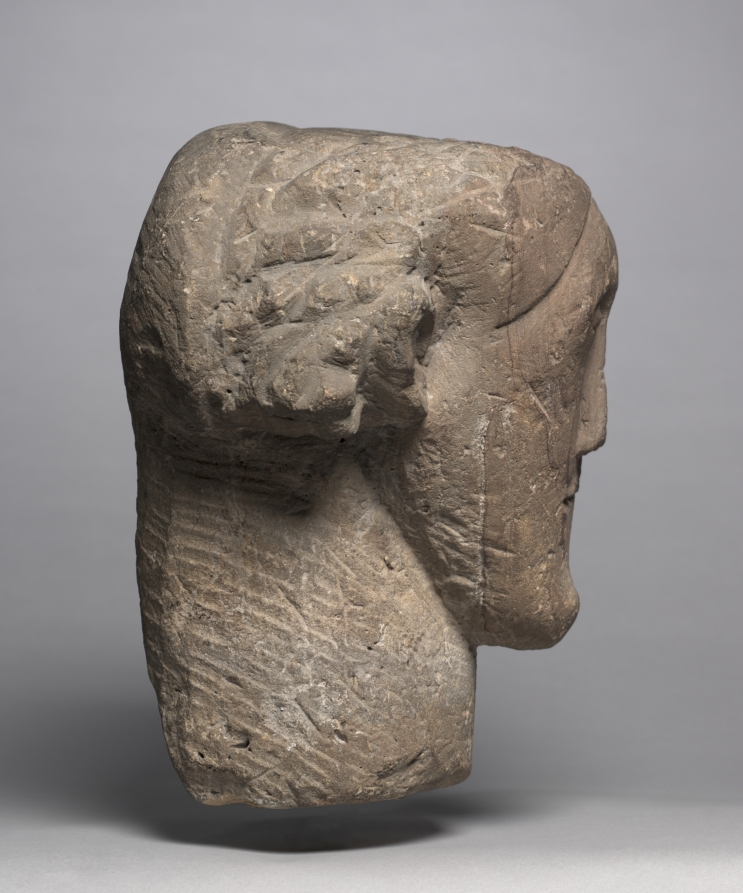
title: Celtic Head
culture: Northern England (Romano-British), Migration period, 2nd-3rd centuries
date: 100–300 CE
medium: sandstone with traces of original red paint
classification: Sculpture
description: This stone head has never been attached to a torso. It is known from ancient literary sources that the Celts, who originally occupied most of northern Europe from Hungary to the British Isles, practiced ritualistic veneration of the human head. For the Celts, the human head represented the seat of mankind’s magical energy. Stone heads similar to this one have survived in large numbers, especially in the upland regions of northern England (the Pennines, the Peak District, and Cumbria) where this one was undoubtedly made by British Celts during the Roman occupation. Such stone heads were probably placed in religious shrines or grottos generally associated with springs, well heads, or natural landmarks for ritual veneration.